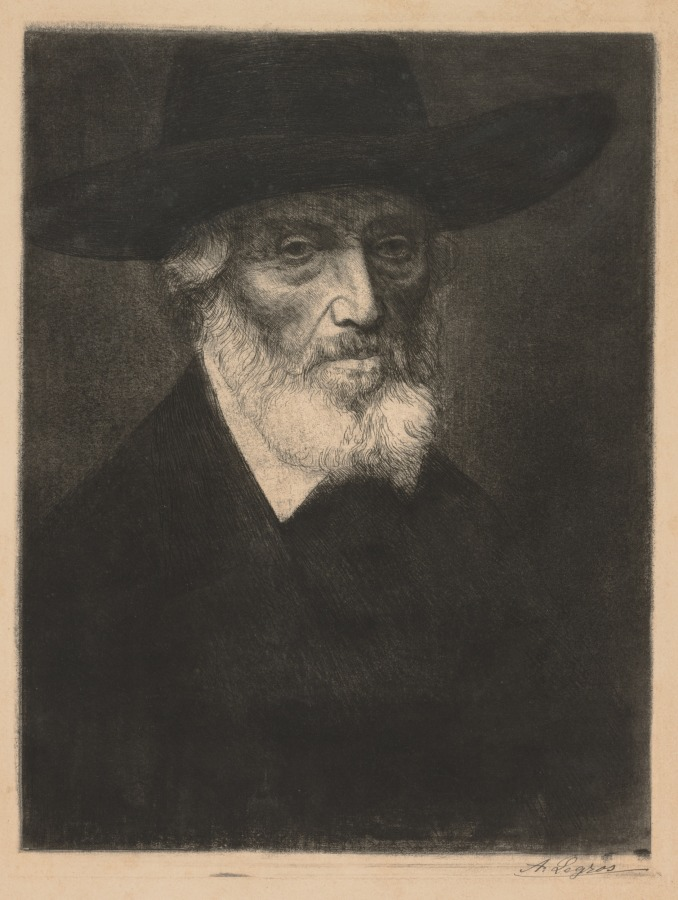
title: Large Portrait of Thomas Carlyle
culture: France, 19th century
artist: Alphonse Legros (French, 1837–1911)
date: c. 1857–1911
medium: etching and aquatint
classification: Print